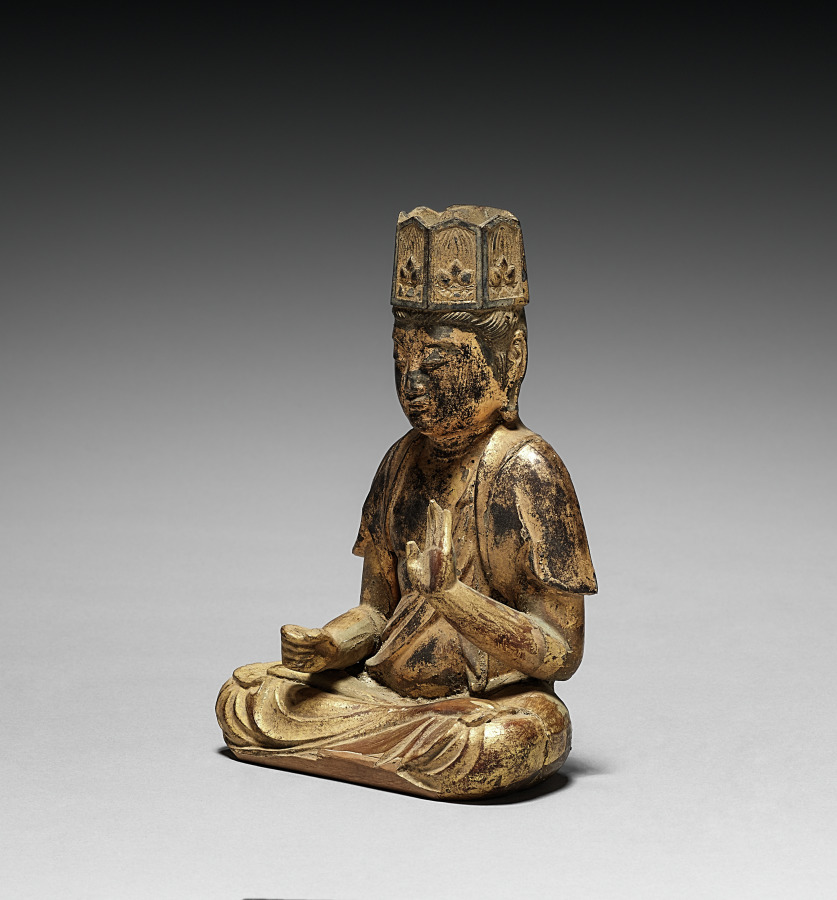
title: Bodhisattva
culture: Japan, Heian period (794–1185)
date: 900s-1100s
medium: gilded wood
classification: Sculpture